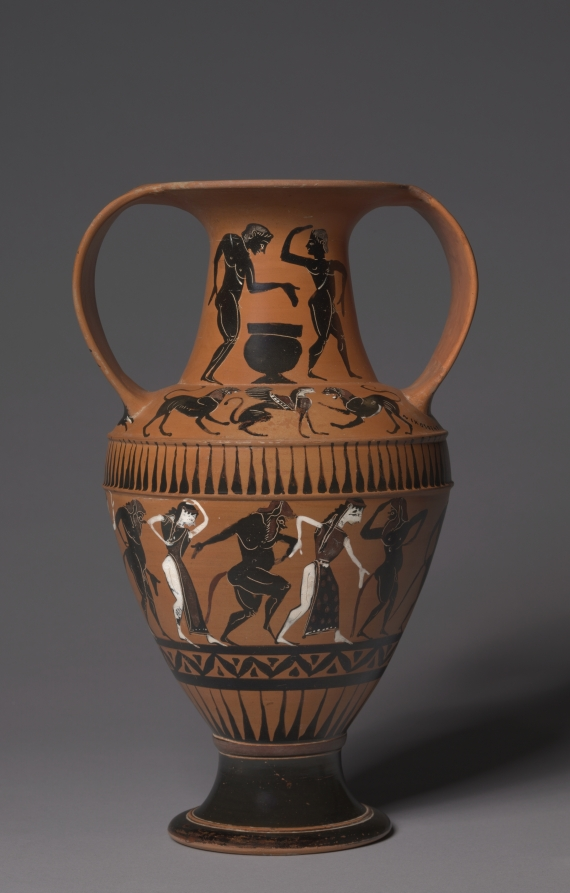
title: Black-Figure Nikosthenic Amphora (Storage Vessel): Dancing Youths; Sphinxes and Lions; Satyrs and Maenads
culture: Greek, Attic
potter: signed by Nikosthenes (Greek, Attic, active c. 545–510 BCE)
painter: attributed to Painter N, Thiasos Group (Greek, c. 530–510 BC)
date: c. 530–510 BCE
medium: ceramic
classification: Ceramic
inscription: inscription Under handle A/B:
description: The distinctive shape of this amphora—wide strap handles, conical neck, and ribs running around the upper body—is a trademark of the potter Nikosthenes, who signed his name below the partially restored handle (together with the verb EPOIESEN, for “made”). Nikosthenes signed nearly 150 surviving vases, more than any other named potter or vase-painter. Made in Athens with an Etruscan clientele in mind, Nikosthenic amphorae emulate precious metal and ceramic bucchero vases made in Etruria (central Italy), where many examples have been discovered. The painted figures include dancing youths (on the neck), sphinxes between lions (on the shoulder), and a continuous procession of dancing satyrs alternating with women (on the body).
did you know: The painter of this vase decorated nearly every available surface; the undecorated handle section is modern.